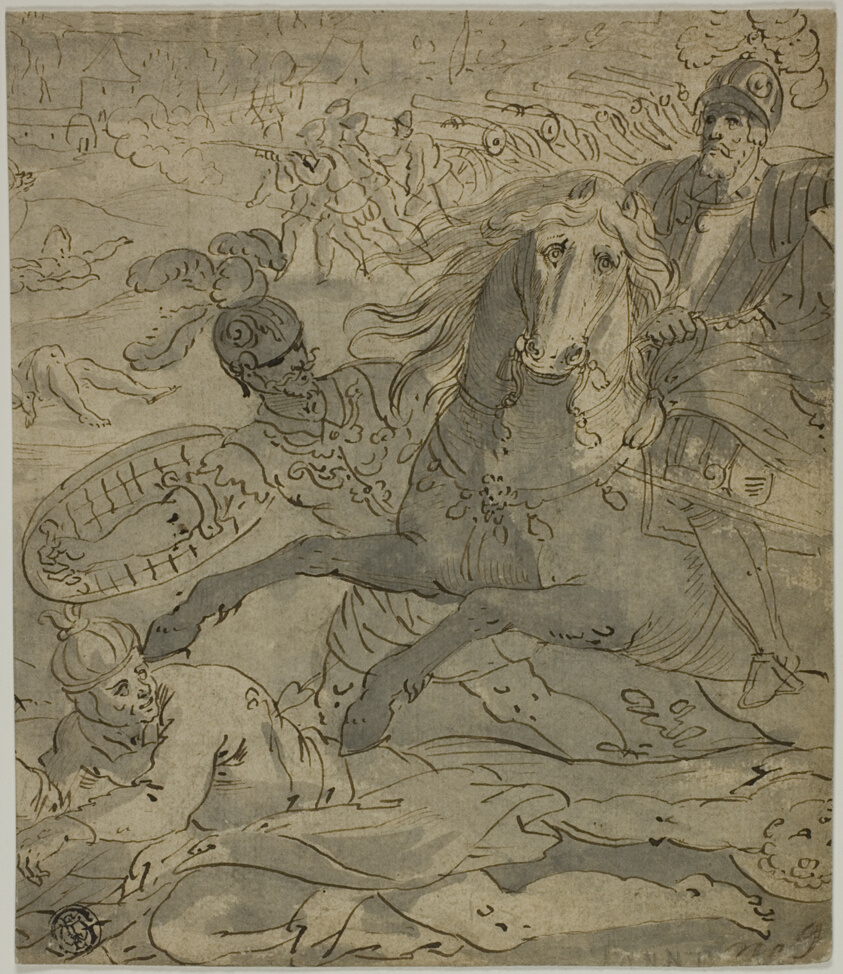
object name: Drawing and Watercolor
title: Battle Scene with Charging General on Horseback in Foreground, Artillery and Cannons in Background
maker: Unknown Artist; Flemish or German, n.d.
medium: Pen and brown ink, with brush and gray wash, on tan laid paper, laid down on cream laid paper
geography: Flanders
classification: pen and ink drawings; drawings (visual works); prints and drawing